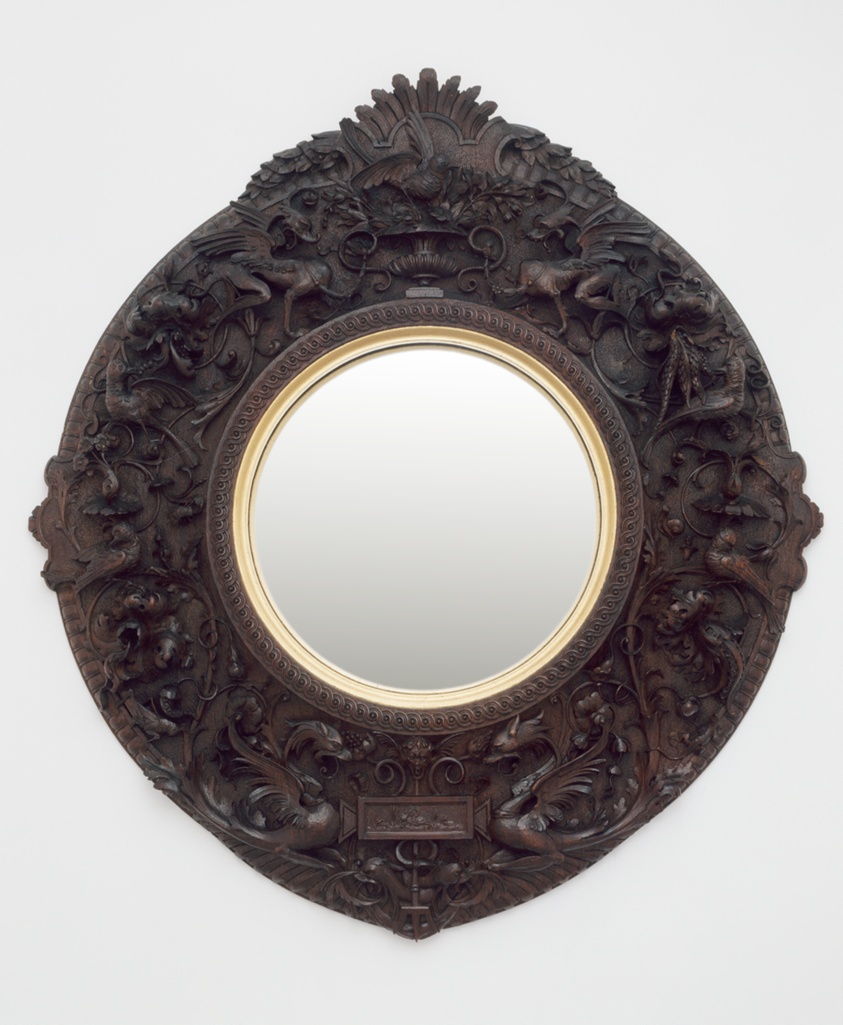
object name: Furniture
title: Mirror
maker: Siena, Italy; Carlo Bartolozzi (Italian, 1835-1922) and Nicodemo Ferri (Italian, c. 1835-1899)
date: 1870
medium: Walnut, glass, and gilding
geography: Siena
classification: mirror; furniture; european decorative arts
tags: furniture